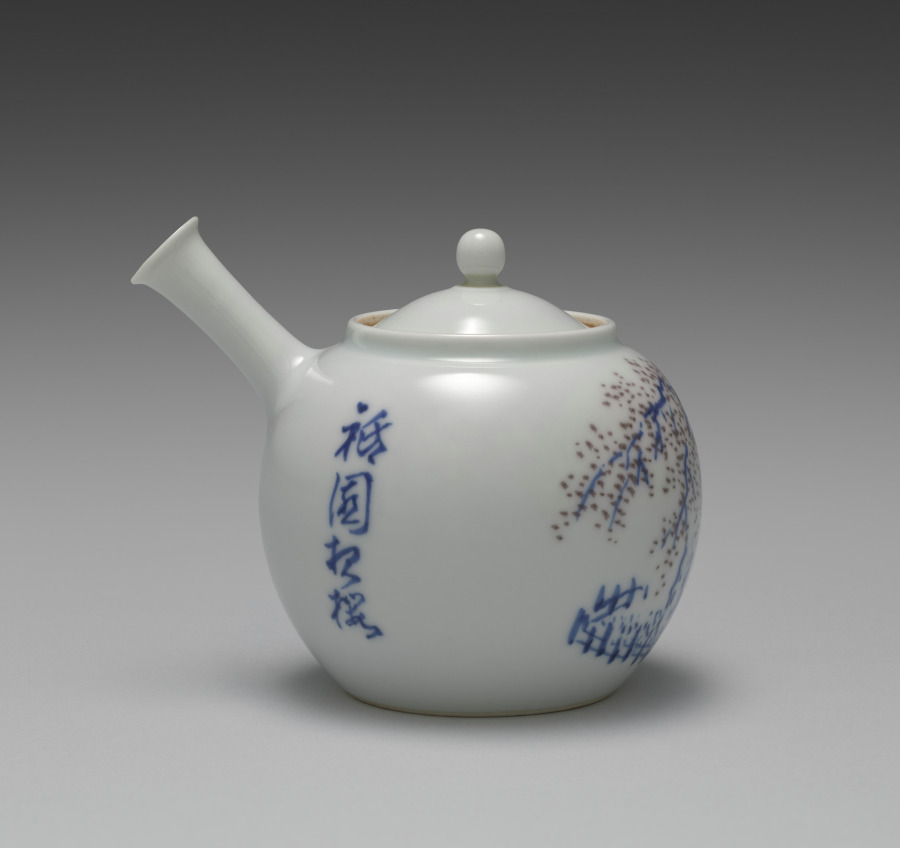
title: Teapot with Cherry at Night in Gion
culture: Japan, Meiji period (1868–1912)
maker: Seifū Yohei III (Japanese, 1851–1914)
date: 1893–1914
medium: Porcelain with underglaze blue and iron oxide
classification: Ceramic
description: This side-handled sencha teapot with the cherry tree has a nearly spherical shape, and its recessed lid has an ovoid knob. It has both blue and a purplish brown under the glaze for the blossoms and embers on one side, and the vertical calligraphy identifies the tree as a cherry tree at night in the Gion area of Kyoto. To the right of the tree, smoke billows from a small lantern fire in a basket suspended on a post. In terms of collecting history, a paper inserted into the box of Teapot with Cherry at Night in Gion is of interest. It is a flyer for Yamamoto Shōseidō, a shop (no longer extant) that sold fine Kyoto ceramics in Osaka.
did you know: This teapot features the Japanese theme of a blossoming cherry tree in the Gion area of Kyoto in underglaze blue and brown.